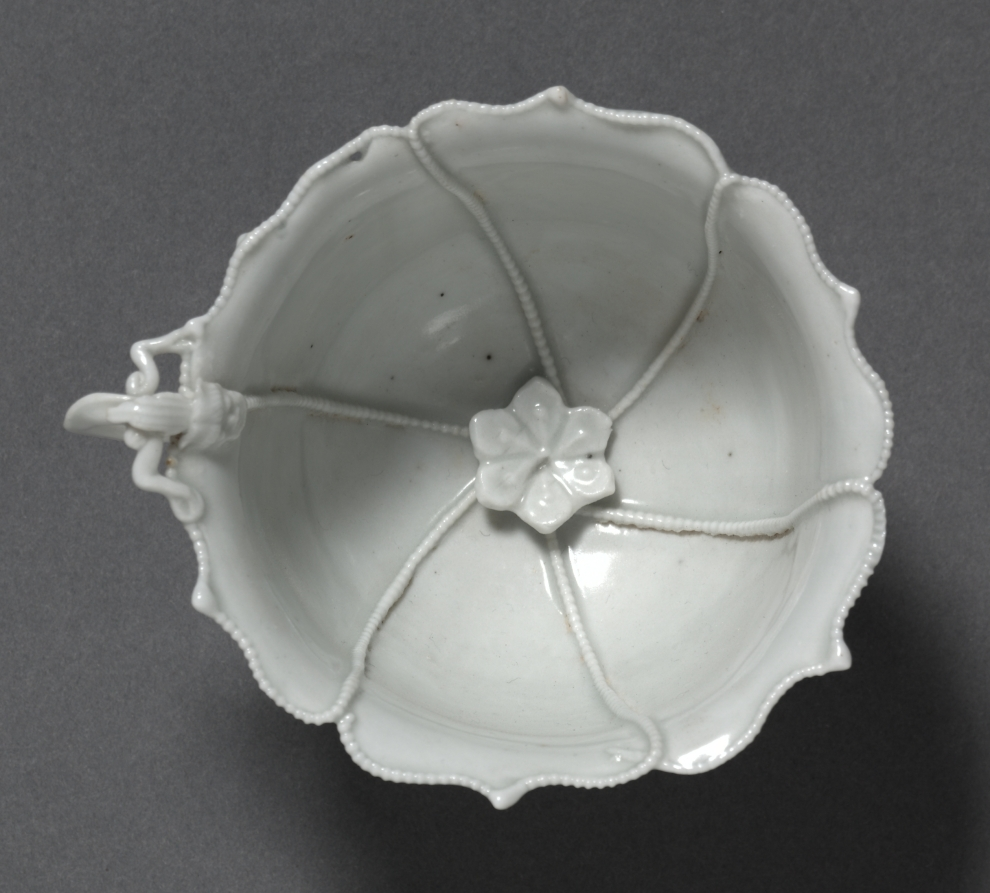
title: Fluted Cup with Dragon Handle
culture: China, Jiangxi Province, Jingdezhen kilns, Yuan dynasty (1271–1368)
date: early 1300s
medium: Glazed porcelain, Qingbai (bluish-white) ware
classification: Ceramic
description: Very thinly potted, the subtly lobed body of this cup is almost translucent. The thin, slightly opaque, light greenish glaze lends a sugary shine. Applied elements, including the handle, beaded borders, and sculptural floret, are constructed and glazed with the same materials as the body, providing a seamless blend of form and decorative embellishment. The result is an evocative reminder of slightly earlier silver cups, also created in the form of flowers. This pristine, natural construction is challenged, however, by the archaic dragon that acts as the handle. Borrowed from the decoration found on much earlier bronzes, this added form illustrates the eclecticism of the Yuan, the attempt to blend present vision with interest in the past.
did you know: Clay beading divides the cup's interior into six foliate panels with a six-petaled flower at the junction of the beaded lines.